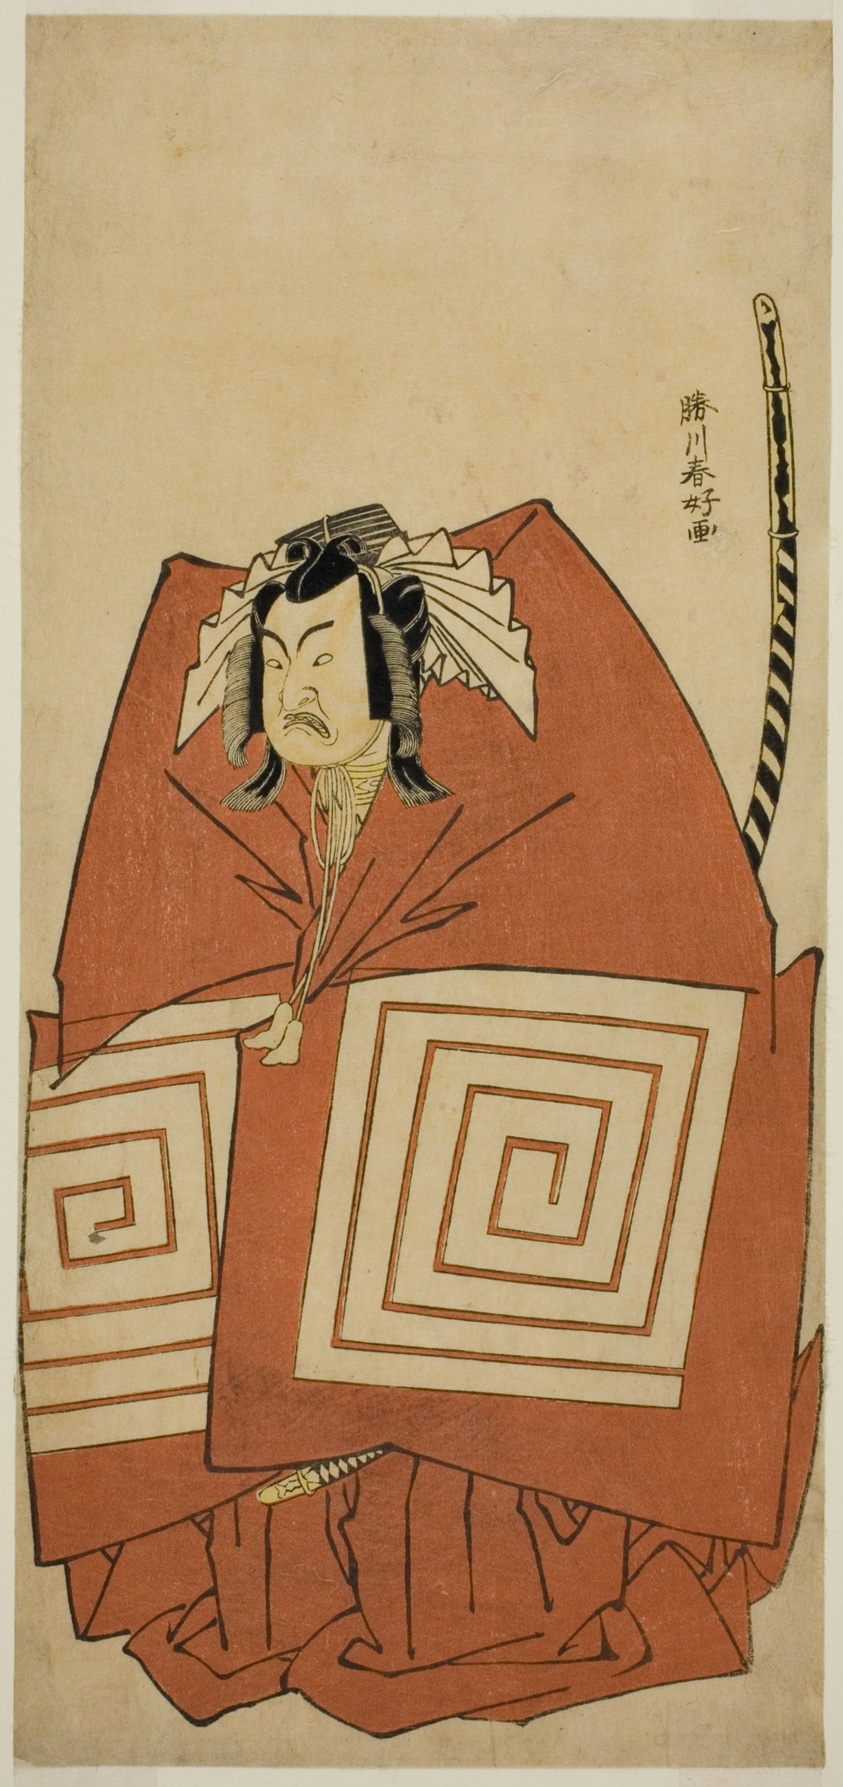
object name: Print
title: The Actor Ichimura Uzaemon IX as Araoka Hachiro in the Play Sakimasu ya Ume no Kachidoki, Performed at the Ichimura Theater in the Eleventh Month, 1778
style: Japanese (culture or style)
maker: Katsukawa Shunko I; Japanese, 1743-1812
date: c. 1778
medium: Color woodblock print; hosoban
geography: Japan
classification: woodblock print; print; asian art